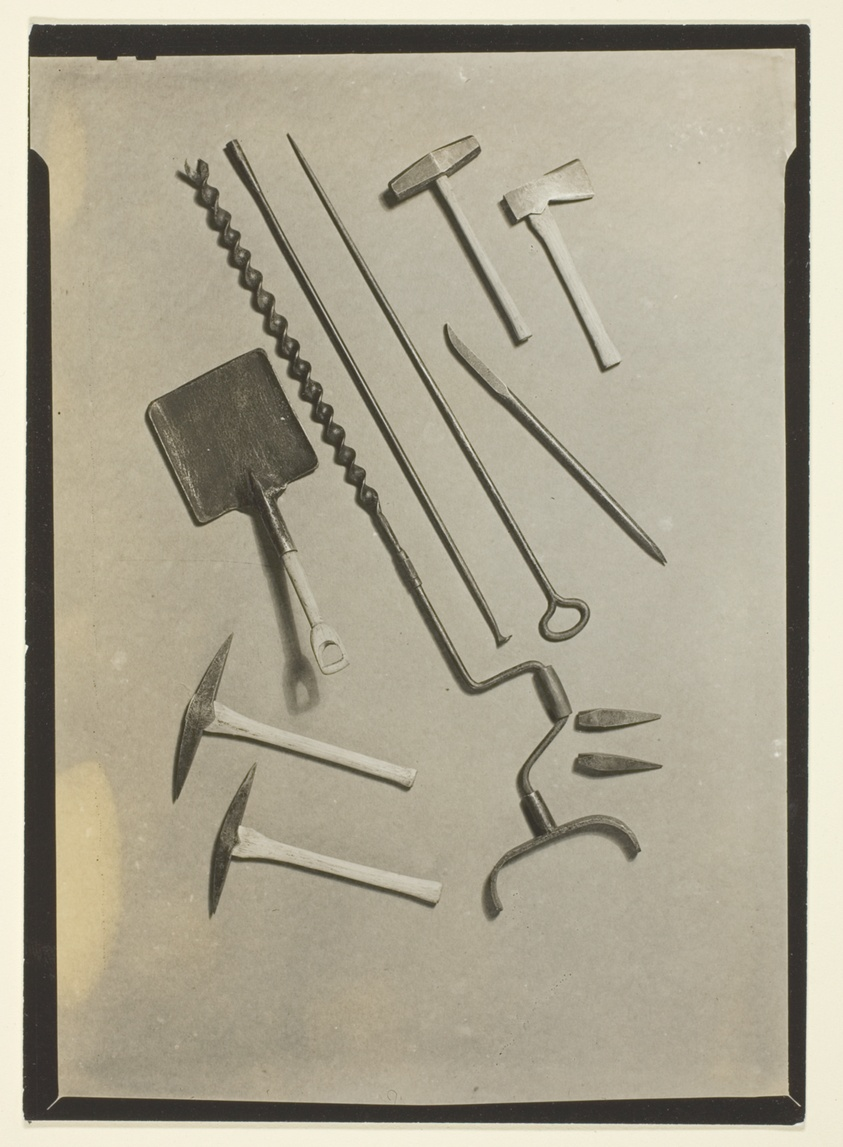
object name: Photograph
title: Untitled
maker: Lewis Wickes Hine (American, 1874–1940)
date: c. 1920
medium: Gelatin silver print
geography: United States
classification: gelatin silver (developing-out-paper) pr; photographic process; photography; photograph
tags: Collected by Hugh Edwards